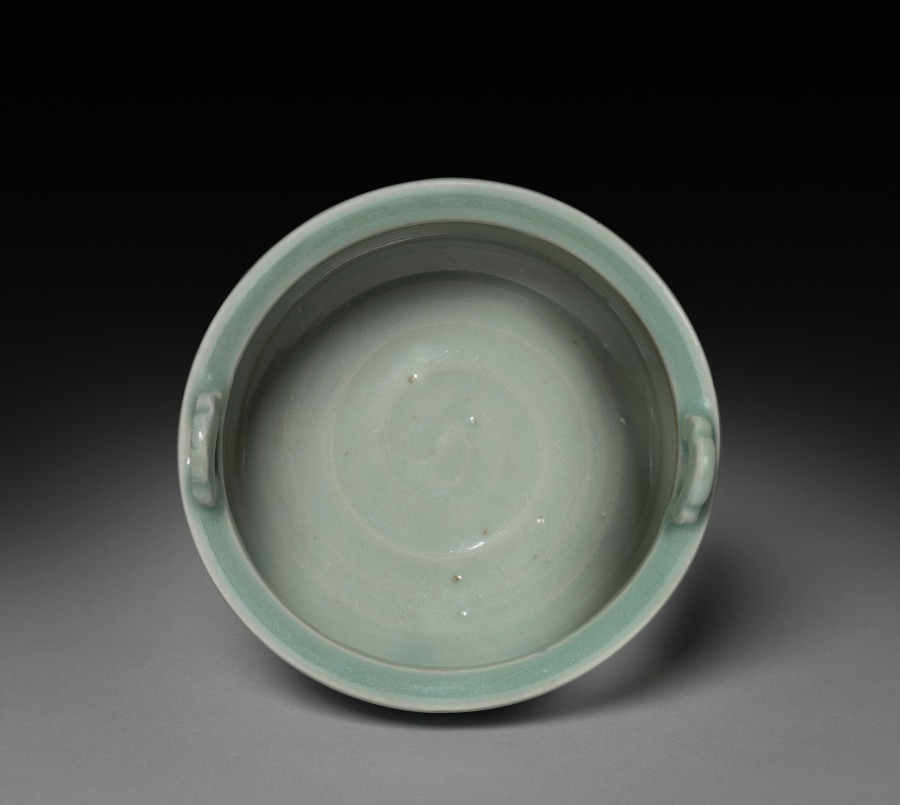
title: Incense Burner: Longquan Ware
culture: China, Southern Song dynasty (1127-1279)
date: S. Sung-Yuan Dynasty, 13th-14th Century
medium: glazed porcelain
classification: Ceramic